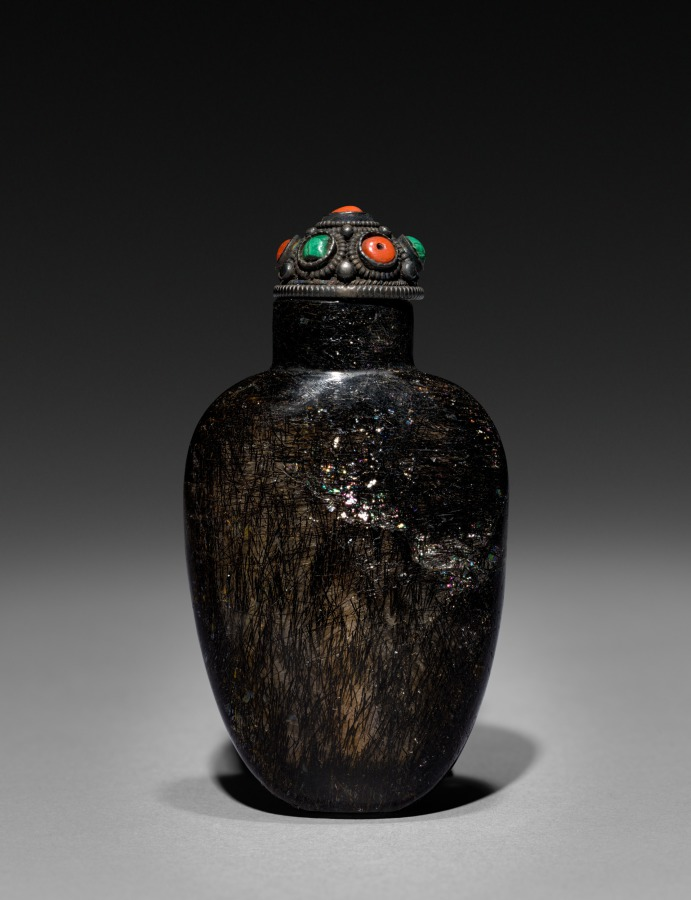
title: Snuff Bottle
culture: China, Qing dynasty (1644-1911)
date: 1644–1911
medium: glass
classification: Glass